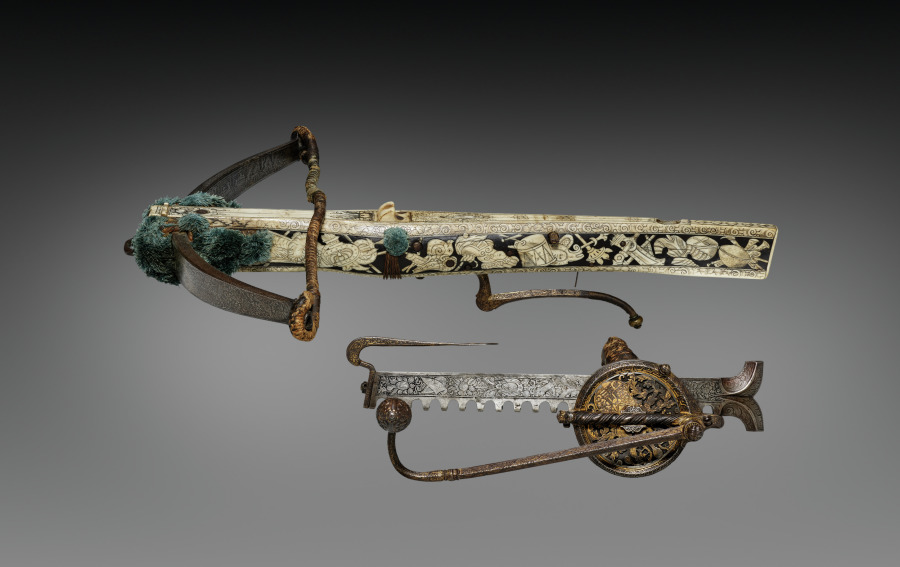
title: Crossbow and Cranequin of Elector Augustus I of Saxony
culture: Germany, Saxony, 16th century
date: c. 1553–73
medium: wood (walnut?), bone veneers, flax cord, steel (etched, traces of gilding). woolen pompoms, stock decorated wih inlaid trophies of arms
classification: Arms and Armor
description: This crossbow was a hunting weapon for Prince Elector Augustus I, a member of the ruling elite in the Holy Roman Empire. Augustus, powerful and wealthy, had even the most practical instruments ornately decorated, including this crossbow and its cranequin, or winding device.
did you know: Augustus was a marksman who took part in crossbow competitions. He had a large collection and often gave them to friends.